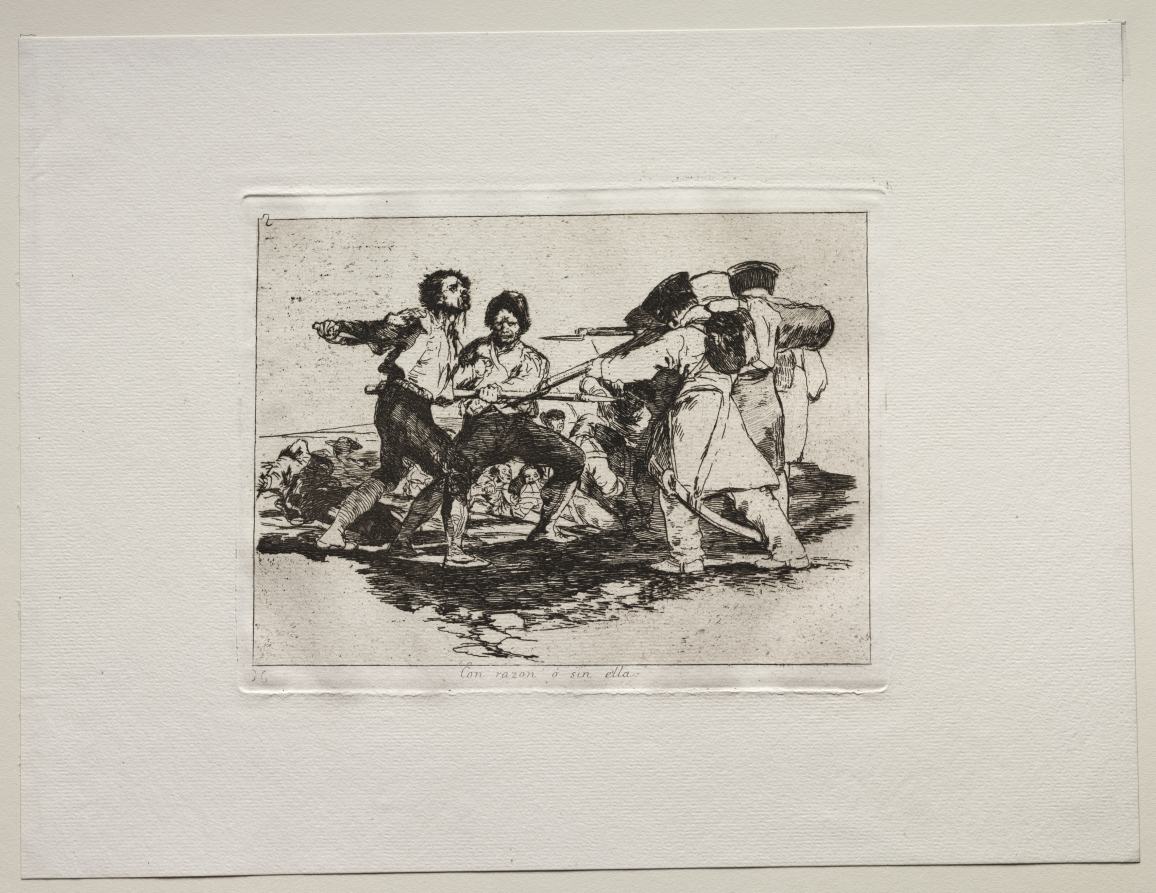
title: The Horrors of War: Rightly or Wrongly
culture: Spain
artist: Francisco de Goya (Spanish, 1746–1828)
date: c. 1810–20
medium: etching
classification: Print